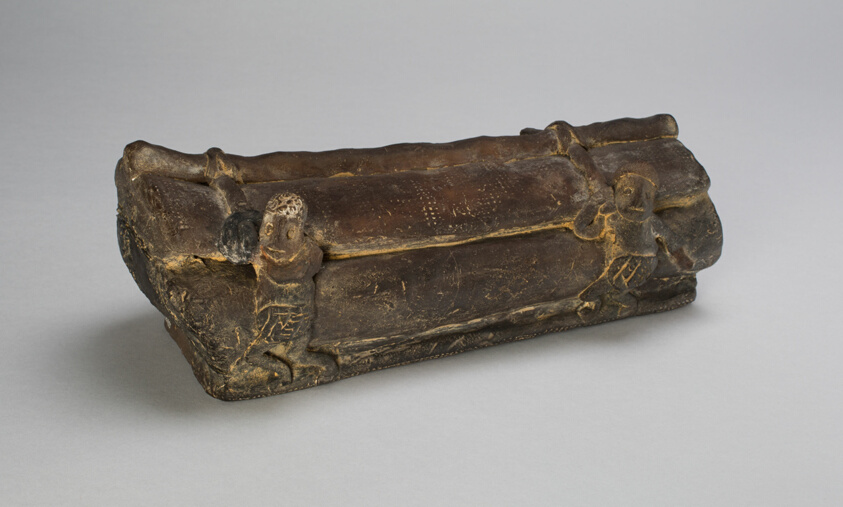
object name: Sculpture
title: Model of a Coffin with Figures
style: Chinese (culture or style)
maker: China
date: Han dynasty or earlier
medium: Earhtenware with molded decoration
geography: China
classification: ceramics; asian art; sculpture